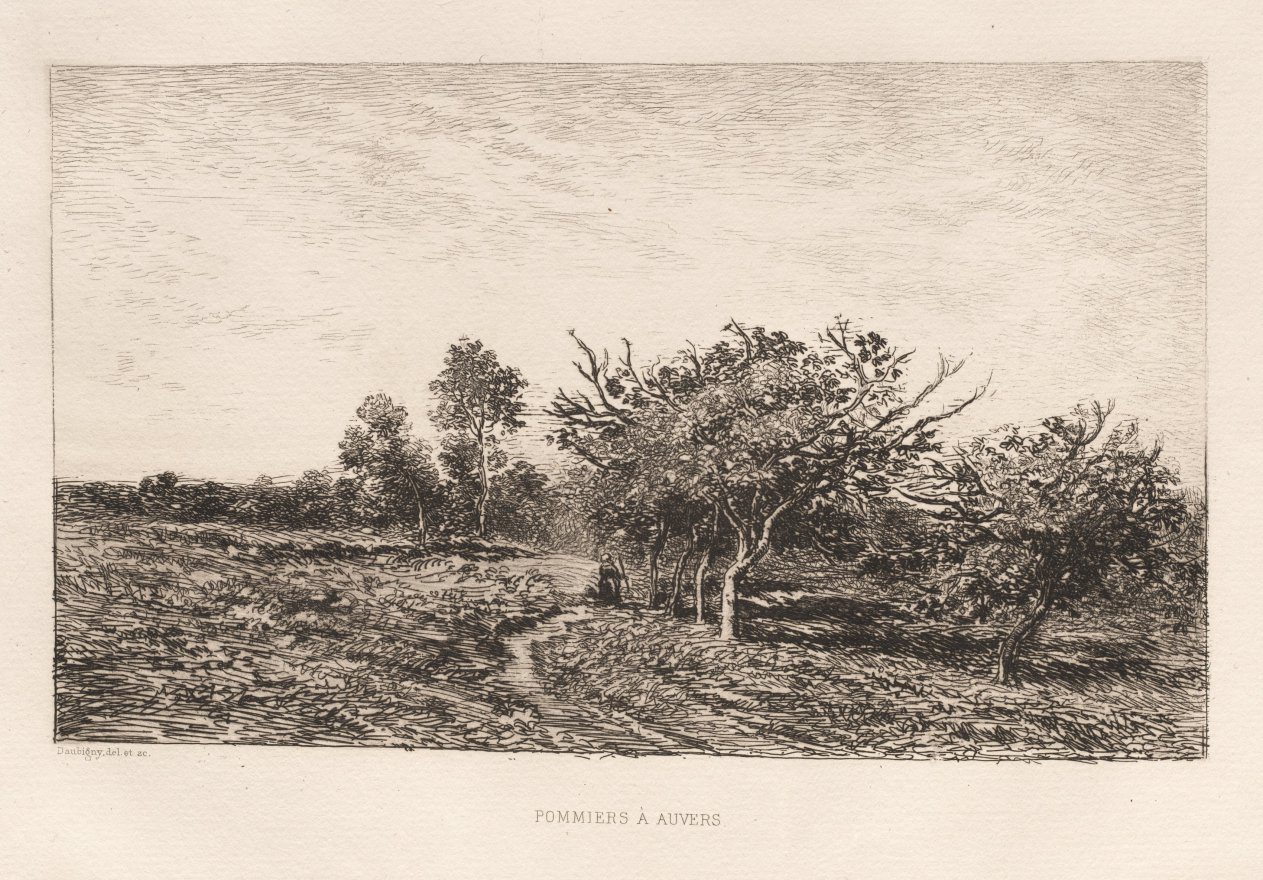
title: Apple Trees at Auvers (Pommiers à Auvers)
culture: France, 19th century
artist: Charles François Daubigny (French, 1817–1878)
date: 1877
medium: etching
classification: Print